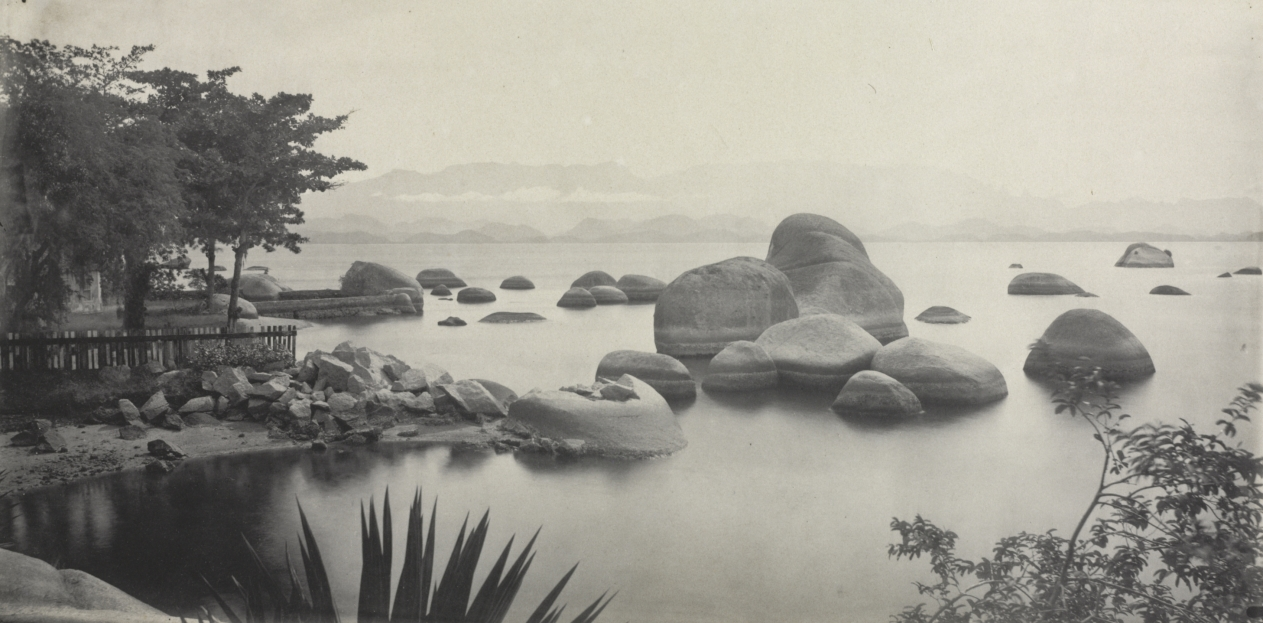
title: Paquetá, Rio de Janeiro, Brazil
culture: Brazil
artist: attributed to Marc Ferrez (Brazilian, 1843–1923)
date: c. 1890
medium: platinum print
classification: Photograph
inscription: written in ink on recto: "N=19"; printed in pencil on verso: "K1116/ bay todos os Santos Paqueta (Brazil) Marc Ferrez?/ of Christies' SoKen lot 96